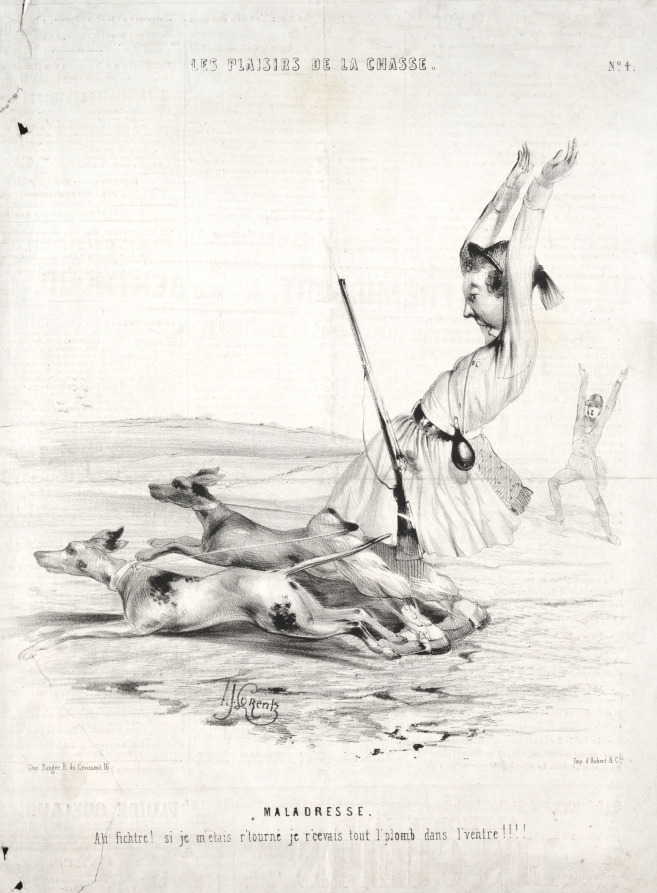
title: Les Plaisirs de la chasse: Maladresse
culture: France, 19th century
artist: Alade Joseph Lorentz (French, 1813-after 1858)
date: 1842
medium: lithograph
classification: Print